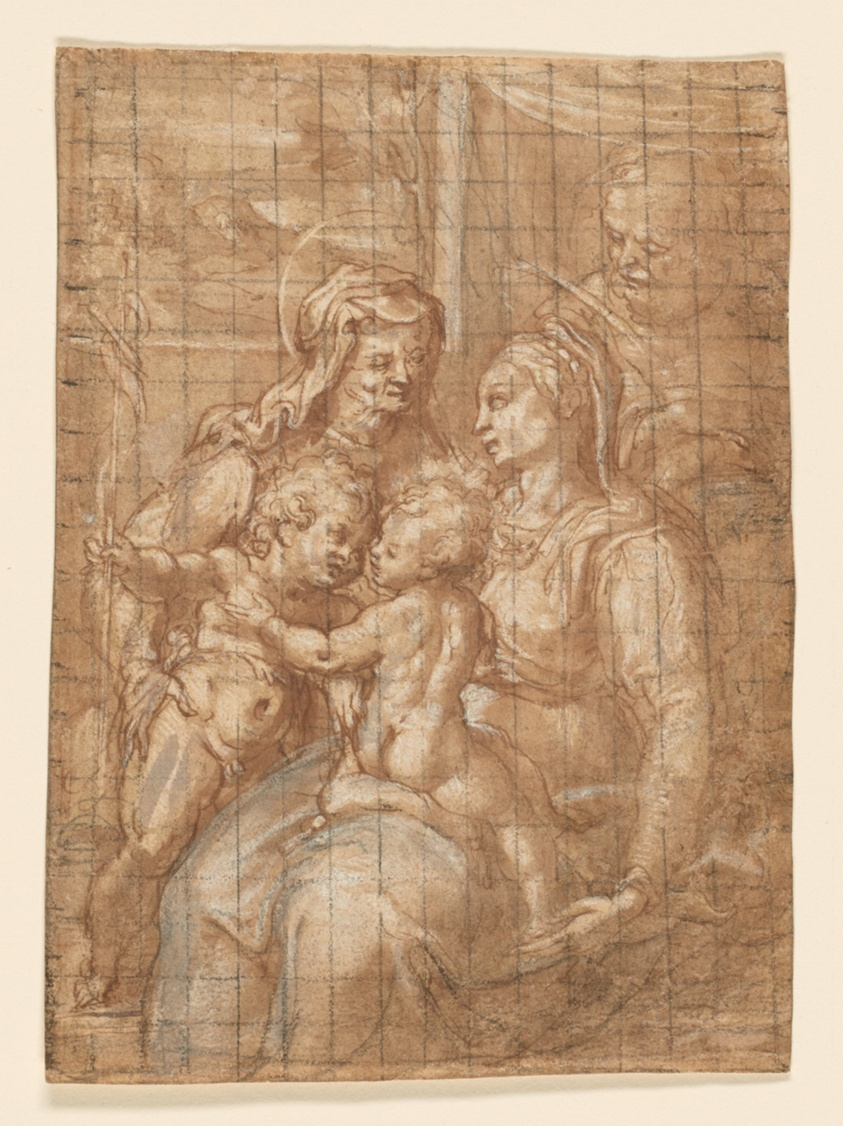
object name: Drawing and Watercolor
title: The Holy Family with Saint John the Baptist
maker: Follower of Federico Barocci (Italian, 1528–1612)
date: 1570/80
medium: Pen and brown ink, with brush and brown and gray wash, heightened with white chalk, on cream laid paper, squared in black chalk, laid down on off-white Japanese paper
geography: Italy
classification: drawings (visual works); paper; prints and drawing